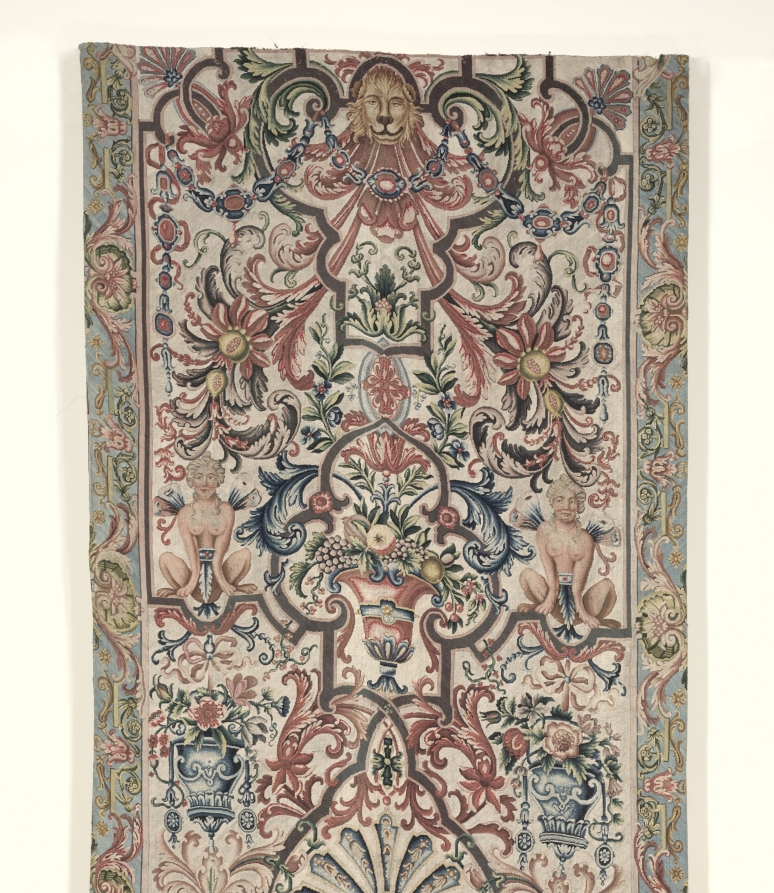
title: Needlework Bed Hanging (1 of 2)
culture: France, late 17th century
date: c. 1690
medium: petit point embroidery; silk and wool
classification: Embroidery